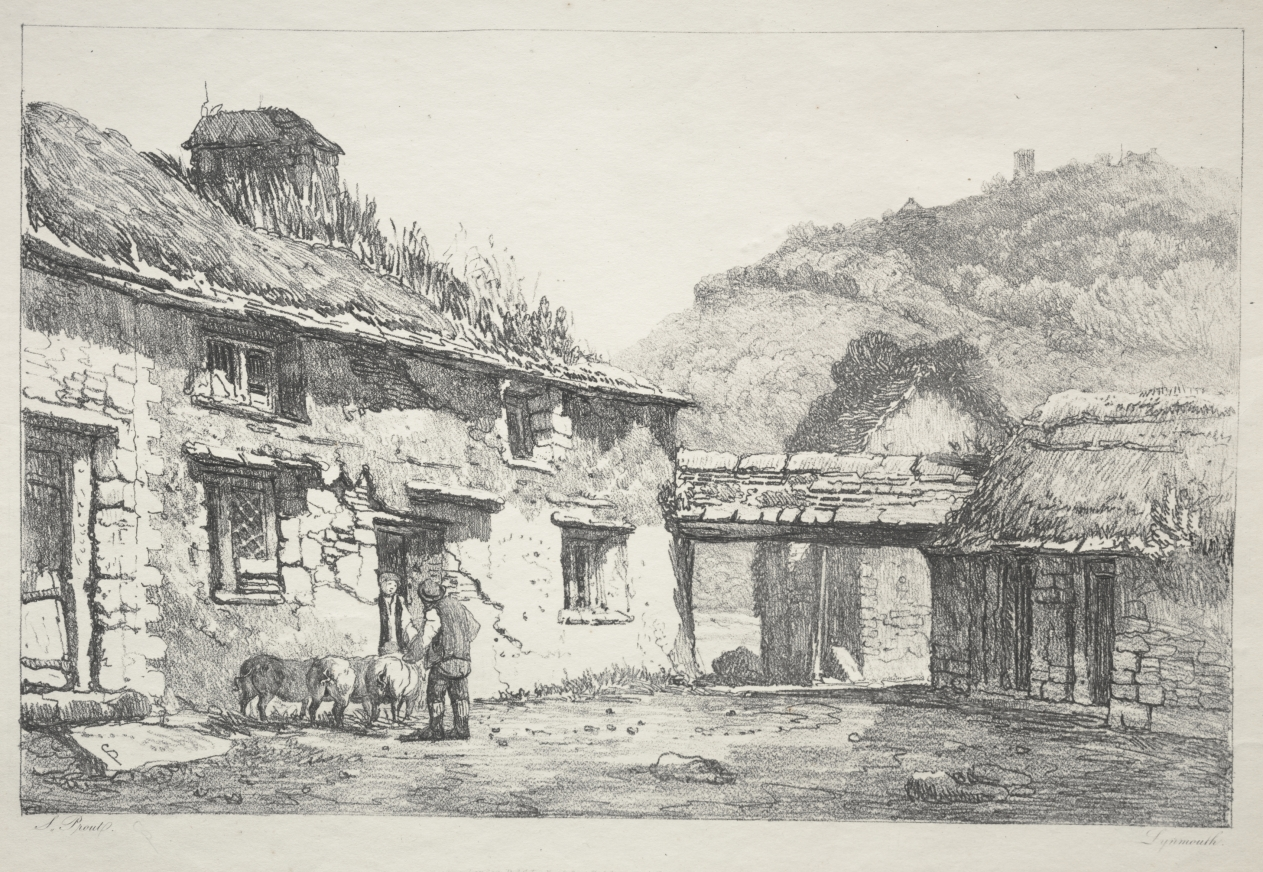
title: Lynmouth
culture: England, 19th century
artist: Samuel Prout (British, 1783–1852)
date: 1819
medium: lithograph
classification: Print